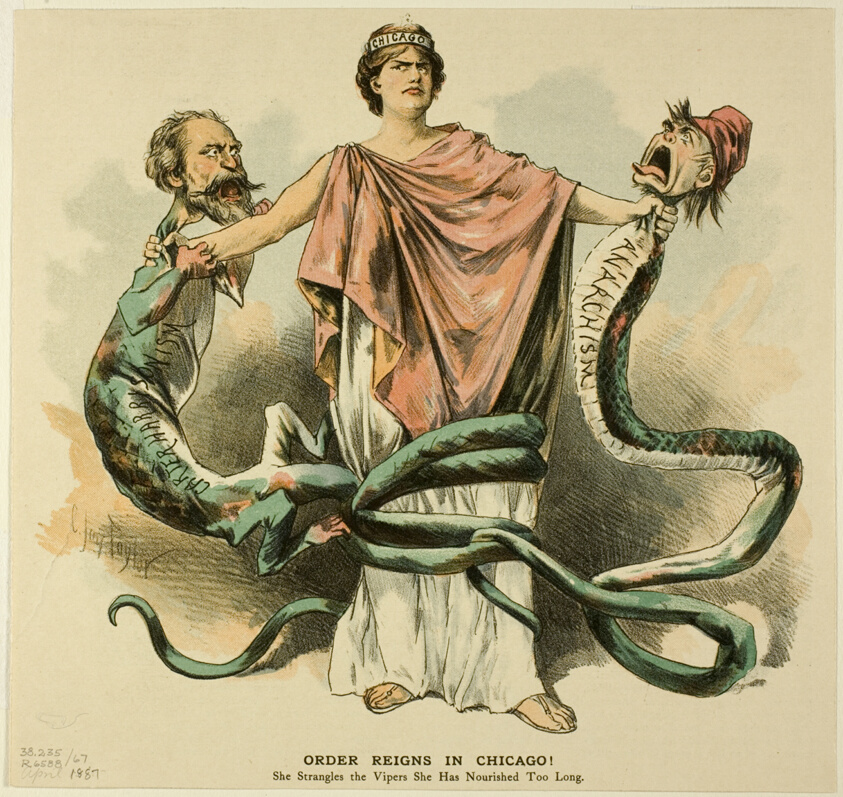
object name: Print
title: Order Reigns in Chicago!, from Puck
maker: C. Jay Taylor (American, 1855-1929)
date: published April 18, 1887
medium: Color lithograph on newsprint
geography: United States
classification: lithograph; print; prints and drawing